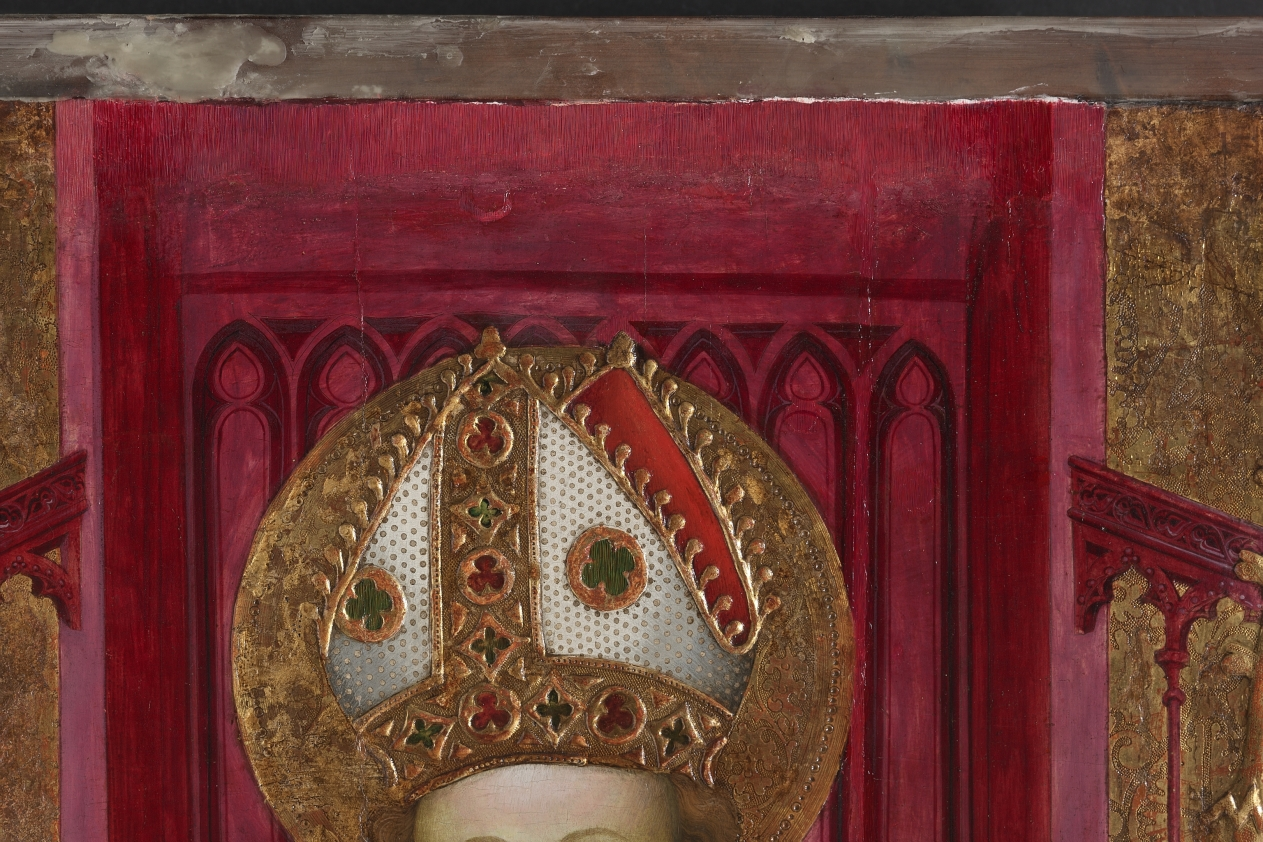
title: A Bishop Saint with a Donor (Saint Louis of Toulouse?)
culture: Spain, Catalonia, early 15th century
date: early 1400s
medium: tempera with raised and gilded gesso on wood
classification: Painting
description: The style of this painting suggests that it comes from Catalonia in northeastern Spain, though the identity of its artist remains unknown. The painting represents a youthful bishop-saint identifiable by a bishop’s symbols of authority, his miter and crozier. He wears rich vestments. Below, the figure in black represents the donor of the painting—likely a wealthy layperson rather than a cleric. The identity of the saintly bishop is speculated to be Saint Louis, Bishop of Toulouse, on the basis of his youth. Louis was consecrated Bishop of Toulouse in 1297, died six months later at the age of 23, and was canonized in 1317. His relics were moved in 1423 to Valencia and his cult flourished in Spain.